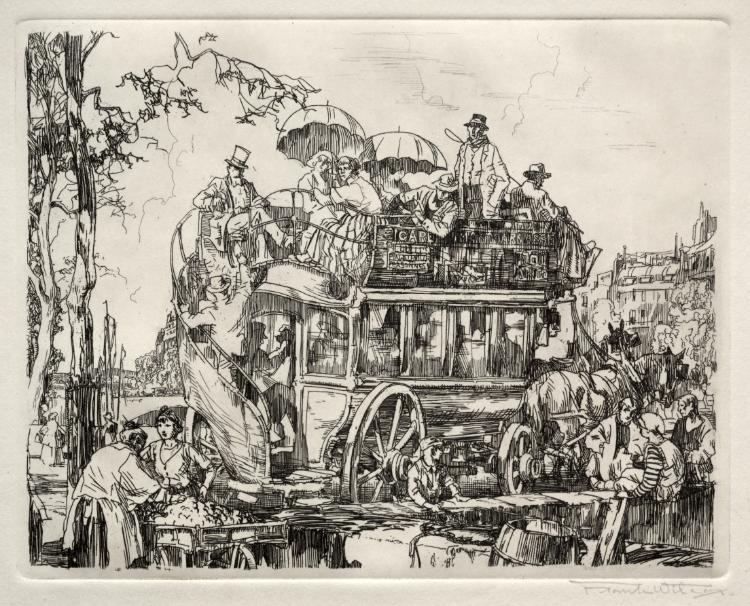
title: The Omnibus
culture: America, Ohio, Cleveland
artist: Frank Wilcox (American, 1887–1964)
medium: etching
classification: Print